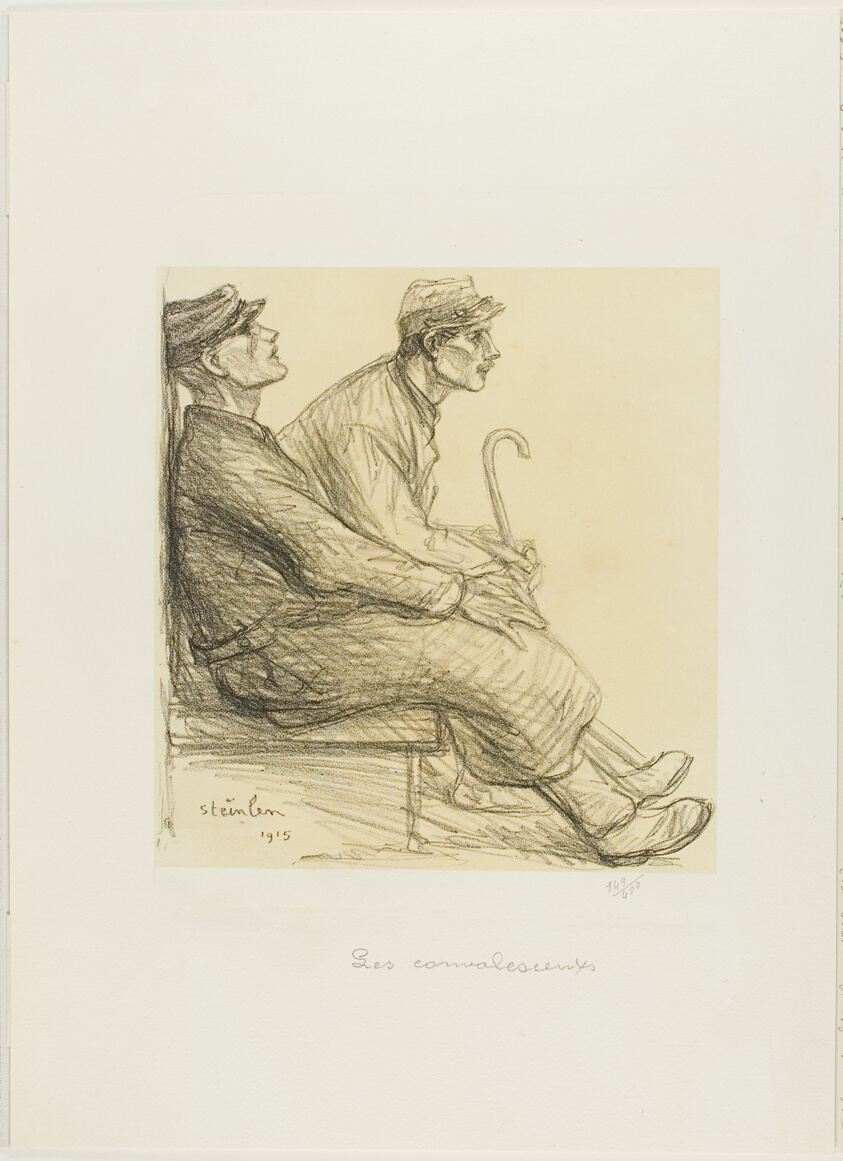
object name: Print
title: The Convalescents, plate two from Actualités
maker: Théophile-Alexandre Steinlen; French, born Switzerland, 1859-1923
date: 1915, published May 1915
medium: Lithograph in black over a fawn tint on thick off-white wove paper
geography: France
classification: lithograph; print; prints and drawing